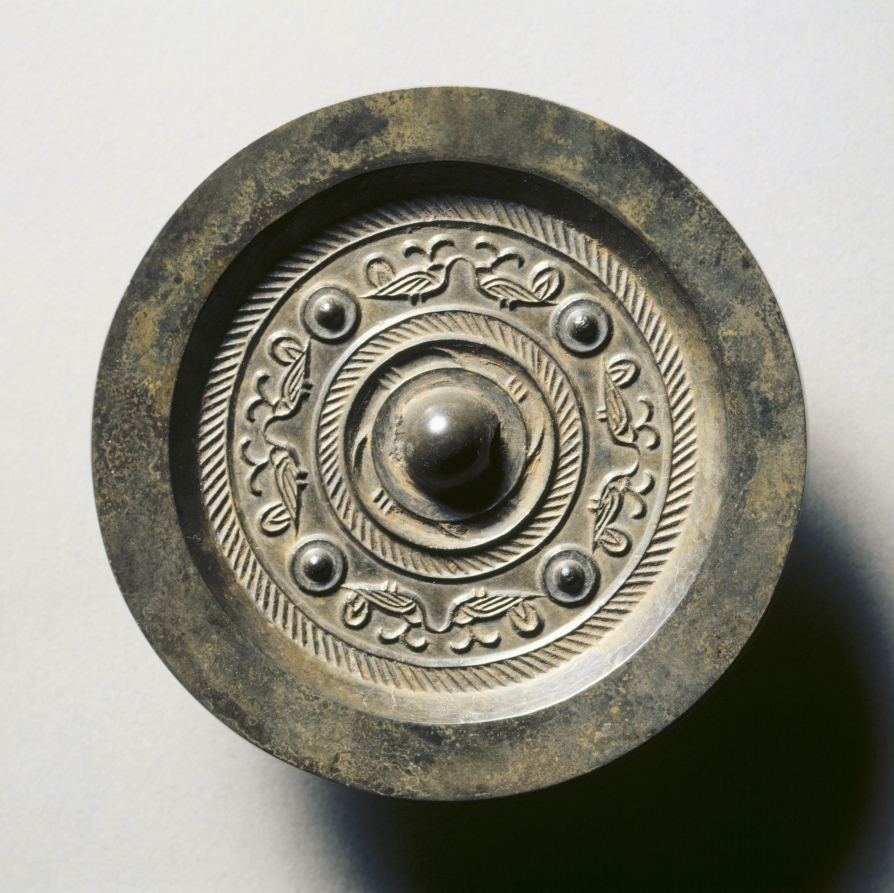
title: Mirror with Four Nipples and Eight Birds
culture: China, Western Han dynasty (206 BCE–8 CE)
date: 100–1 BCE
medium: bronze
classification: Metalwork